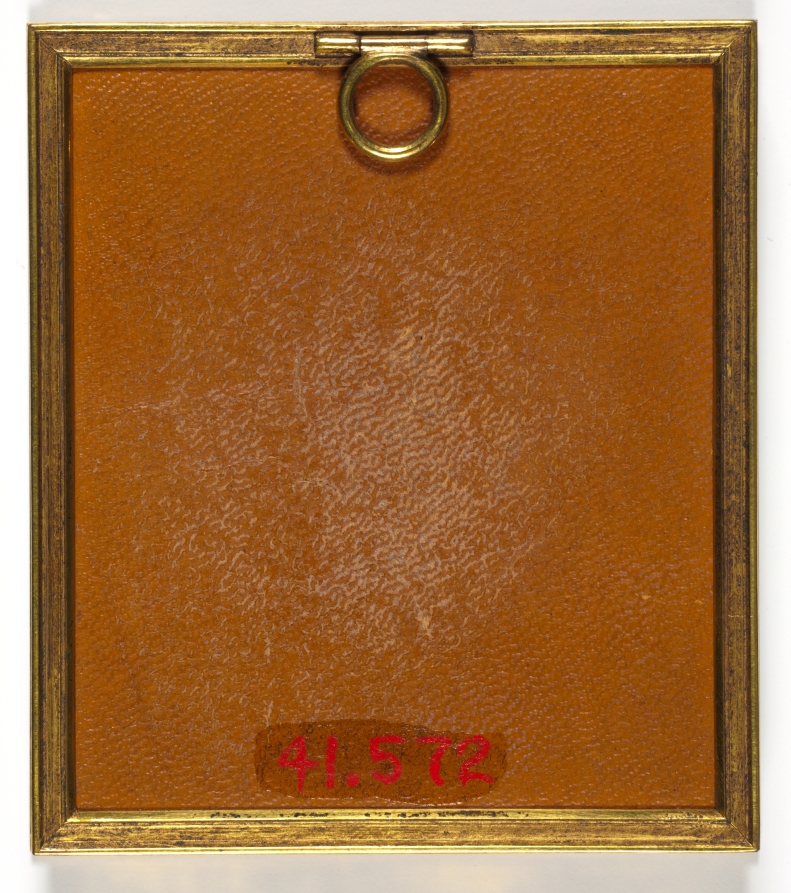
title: Portrait of Charlotte Bertie, née Warren, 4th Countess of Abingdon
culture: England, 18th century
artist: John I Smart (British, 1741–1811)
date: 1778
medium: graphite and wash on laid paper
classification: Portrait Miniature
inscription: inscribed on verso of paper to top in brown ink: [L]ady Abingto[n] 1778; inscribed at bottom of verso in graphite: J Smart / Lady Abington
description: Although it is impossible to say if it was always part of the artist’s process to execute a preparatory sketch prior to painting each miniature, we do know that John Smart retained many hundreds of these sketches. A group of preparatory sketches—of which this portrait is one—descended through the Smirke family after Smart’s daughter Sarah gave a sketchbook containing preparatory portrait studies to her friend Mary Smirke, sister of the celebrated Victorian architect Sydney Smirke. This book was probably broken up around 1877 when it was divided between Sydney’s daughters Mary Jemmett and Mrs. Lange, whose portions were both sold at auction in 1928. G. C. Williamson was the first to suggest that Smart’s sketches were well known and that they were preparatory studies for the painted miniatures. Williamson listed the names of sitters from the sketches known to him at the time, and they included Lady Abingdon. Here, Lady Abingdon’s head and shoulders face right. Her brown hair is dressed high on her head, and a strand of pearls is woven through the left side of her coiffure. A veil descends from the top of her head, past her shoulders. She has gray eyes. Compared to his contemporaries George Engleheart (1752–1829) and Andrew Plimer (1763–1837), whose female sitters were often painted in similar simple white gowns, Smart often lavished more attention on the costumes in his portraits of women, whose dresses incorporated colored silks, printed fabrics, and luxury trimmings like lace and fur. Thus, Lady Abingdon wears a low-necked, pink dress trimmed with ermine and strands of pearls. The background is unpainted. The removal of the paper backing revealed an inscription in brown ink, written in Smart’s hand, dating the work and verifying the identity of the sitter as Lady Abingdon. Lady Abingdon (d. 1799) was the daughter of Admiral Sir Peter Warren, K.B., M.P. She married Willoughby Bertie, 4th Earl of Abingdon, in 1768. They had six children, two of whom died very young. It is for Lady Abingdon that Abingdon Square in New York City is named, courtesy of her father, who had purchased 300 acres of land in Greenwich Village in 1744. Her husband’s famous protestations against the British government’s treatment of America during the War for Independence ensured that even in 1794, when the New York city council was rooting out British names from public streets and spaces, the name of Abingdon Square was retained. The family was painted by some of the great artists of the day, including Nathaniel Dance-Holland (1735–1811) and John Francis Rigaud (1742–1810). The formal portrait of 1769 by Dance-Holland, in which Lady Abingdon is depicted in coronation robes and holding her peeress’s coronet, conveys the pomp and tradition expected from a marriage portrait of a powerful peer. But even Smart’s miniature portrait sketch of almost a decade later maintains some of this grandeur, depicting the countess with aristocratic bearing and wearing the rich ermine-trimmed gown to which her station entitled her. A miniature on ivory corresponds to this preparatory sketch, although it is dated 1777, suggesting that the sketch may have been executed the following year in preparation for a second version of the portrait. There are slight differences in the details of the dress, particularly the left sleeve—which has been lengthened—and a slight reduction in pearl and ermine trim. The portrait on ivory also has somewhat more softness in the facial features, but many of the details, including the veil and the lock of hair on the right shoulder, are extremely similar. The miniature’s current location is unknown.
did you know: Sketches helped John Smart work out the particulars of a portrait before commencing the miniature on ivory, and they were useful in the event that a duplicate might later be required.